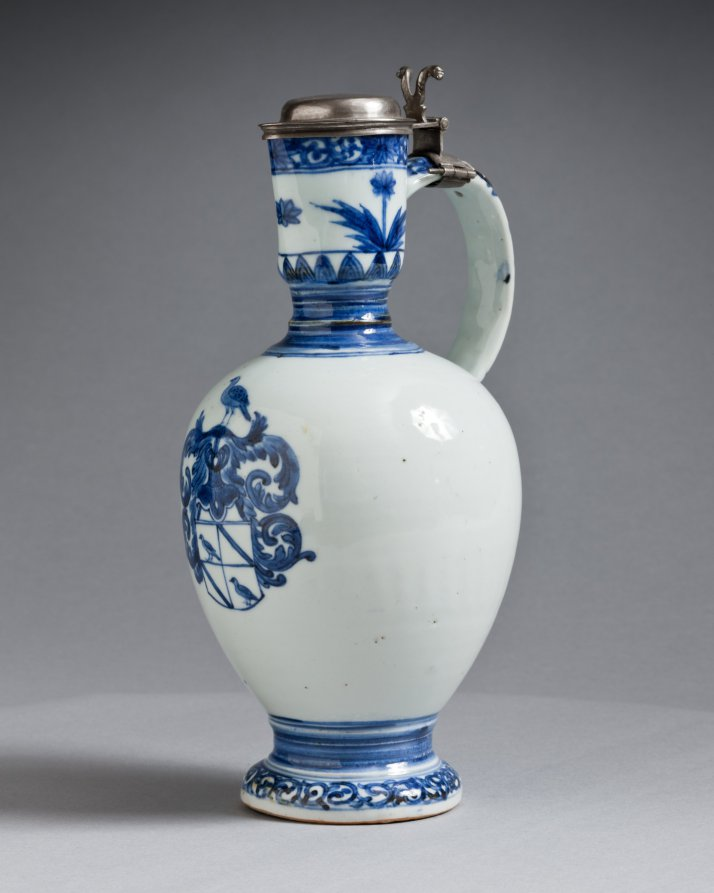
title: Jug with Silver Mounts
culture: Japan, Edo period (1615–1868)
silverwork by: Barent van Leeuwen (Dutch, 1637–1682)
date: c. 1662–76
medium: porcelain with underglaze blue decoration and silver mounts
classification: Ceramic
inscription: [on silver]: town mark for Amsterdam; lion rampant crowned (alloy mark for 0-934 silver); d (date letter for 1666), maker's mark of Barent van Leeuwen.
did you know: The coat of arms on this jug are those of the Valckenier family, active in the Dutch East India Company.